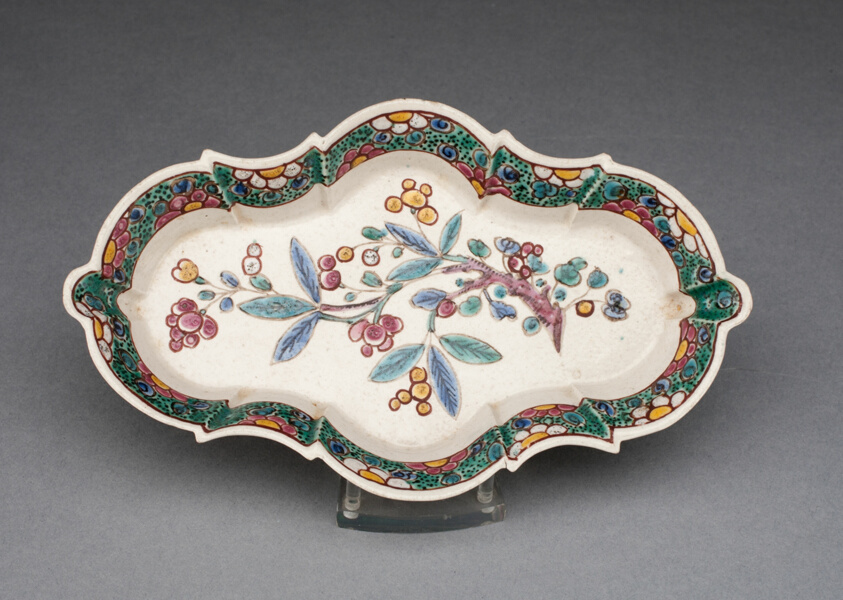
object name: Ceramics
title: Spoon Tray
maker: Staffordshire, England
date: 1750/60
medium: Salt-glazed stoneware, polychrome enamels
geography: Staffordshire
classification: salt-glazed stoneware; european decorative arts; ceramics; stoneware